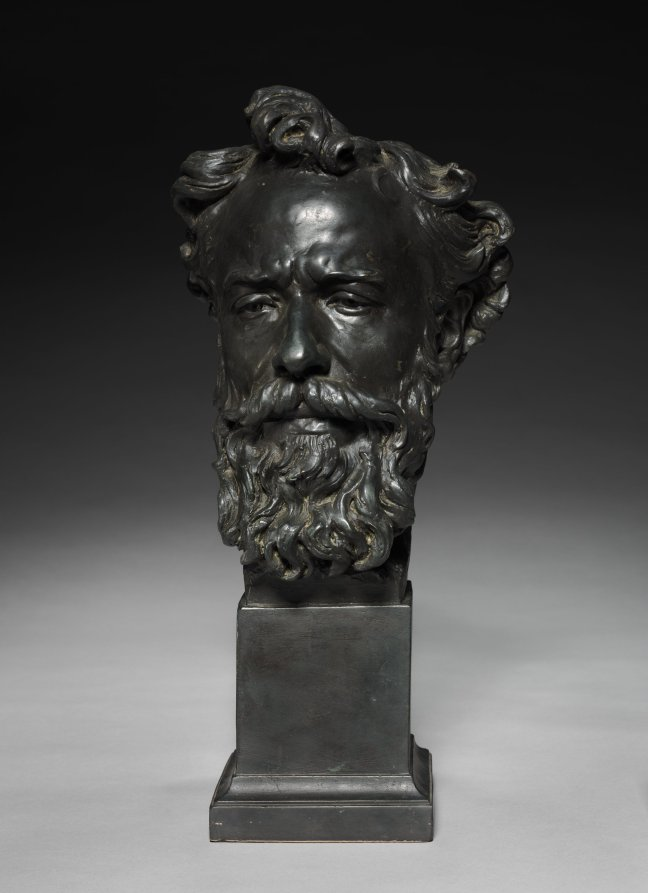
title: Head of Alphonse Legros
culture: France, 19th century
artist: Jules Dalou (French, 1838–1902)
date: c. 1876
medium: bronze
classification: Sculpture